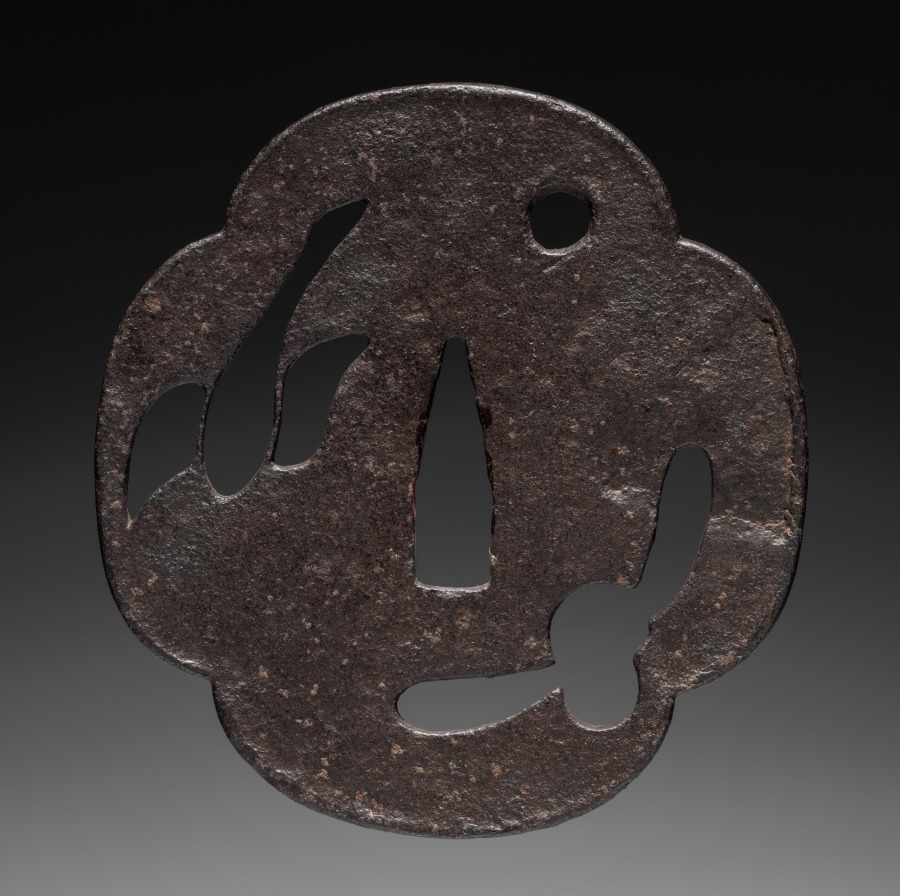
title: Sword Guard (Tsuba) with Geese and Moon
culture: Japan, possibly Edo period (1615-1868)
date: c. 1615–1868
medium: iron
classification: Arms and Armor